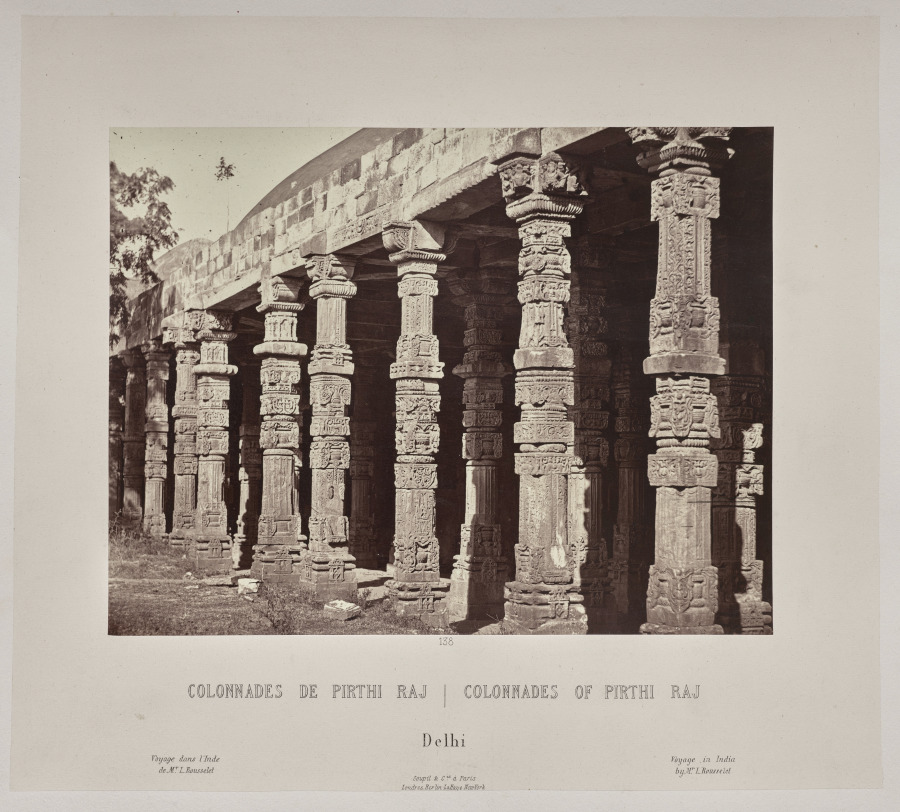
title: Colonnades of Pirthi Raj, Delhi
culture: France, 19th century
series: India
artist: Louis-Théophile Marie Rousselet (French, 1845–1929)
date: 1865–68, published 1869–70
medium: Albumen print from glass plate negative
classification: Photograph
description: Concerned that his drawings did not do justice to the splendor of India’s monuments, Rousselet learned photography in India that year, a remarkable accomplishment. He proved to be a talented photographer with a sophisticated sense of composition. The scenes in this volume sweep across sites of Sultanate, Rajput, and Mughal power in northern India, from the sacred Hindu city of Varanasi on the Ganges River to Alwar in Rajasthan. Also included are several scenes of industry and portraits of Indian rulers.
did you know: Louis Rousselet described himself as a “scientific traveler” when he went to India alone at age 18 in 1863 and stayed into 1868.